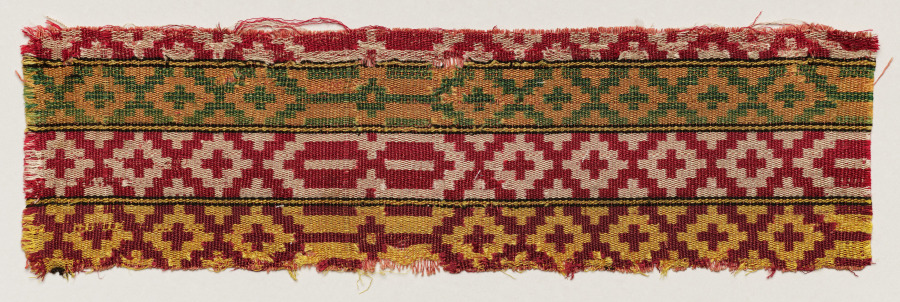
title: Fragment of a furnishing textile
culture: Africa, North Africa, Morocco, Moroccan weaver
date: 1800s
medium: Silk, dye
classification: Textile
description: This textile is made of woven silk, with a pattern of repeating crosses alternating in different color combinations. The fragment was likely once part of a furnishing textile, perhaps used to cover a pillow or other household object.